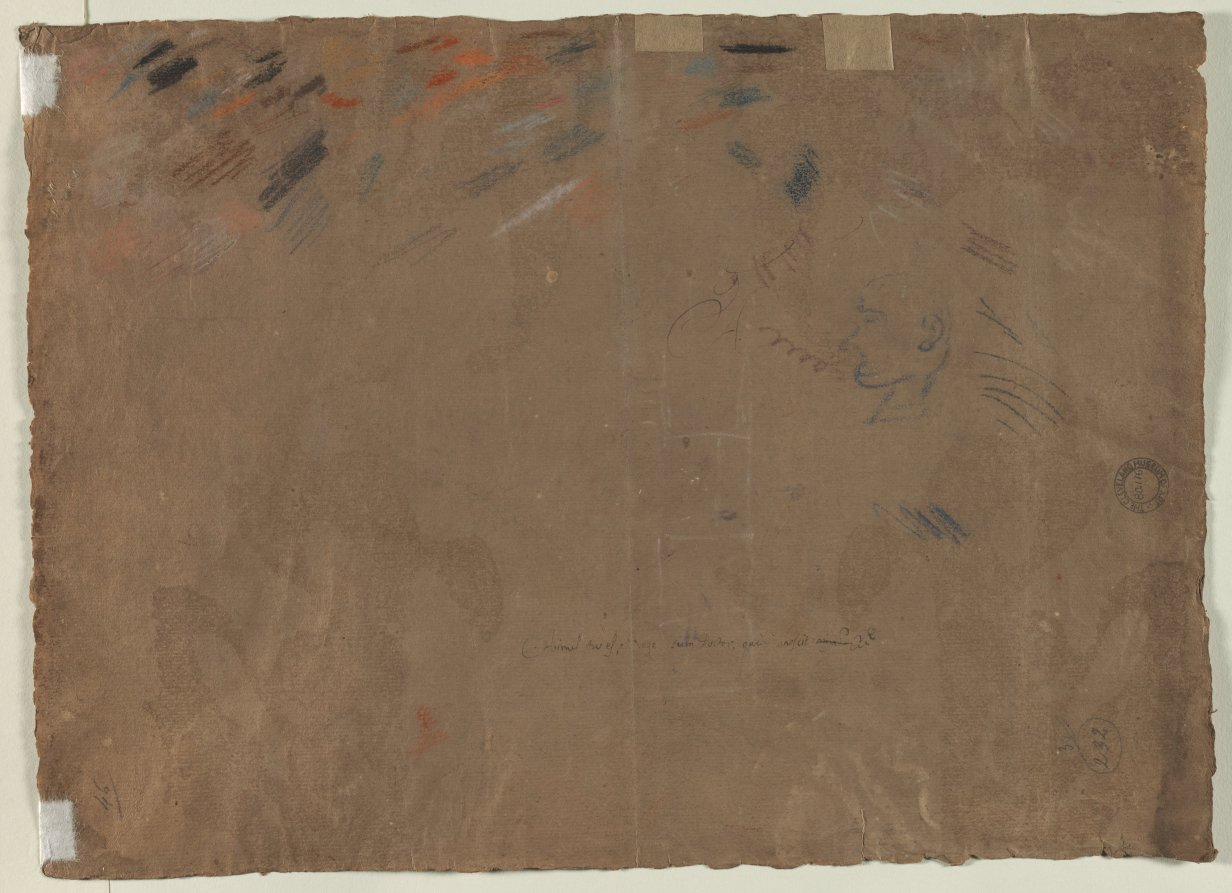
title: Sketch of a Head (verso)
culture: Italy, 18th century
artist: Gaetano Gandolfi (Italian, 1734–1802)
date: 1780s?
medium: blue pastel (head); random pastel marks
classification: Drawing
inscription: center, in brown ink: A. ; lower center, in brown ink: Asimil tu es, e[t?] ego [s?]um Doctor, quid anoscit [illegible, crossed out] [illegible] ; lower left, in graphite: 46 [underlined, sideways] ; lower right, in graphite: 33 [sideways] / 232 [circled, sideways]